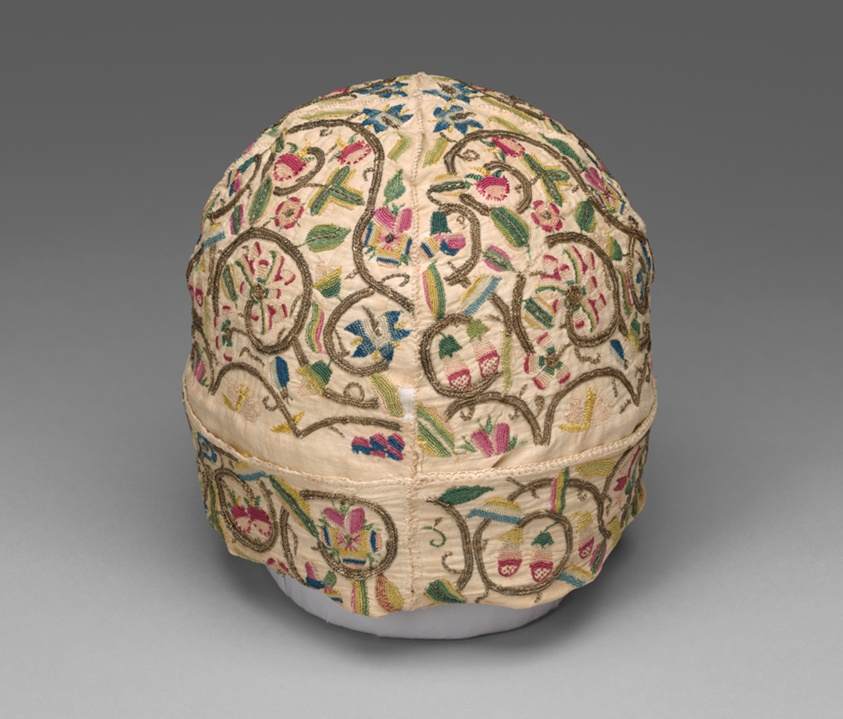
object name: Costume and Accessories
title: Man's Cap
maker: England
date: 1601/25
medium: Linen, plain weave; embroidered with silk floss and gilt-metal-strip-wrapped silk, in variety of buttonhole, chain, long-armed cross, ladder, outline, and running stitches; woven wheels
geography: England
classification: textile; needlework (visual works); patterns (guides); accessories (object genre); costume accessory; costume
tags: floral arrangements, fruit